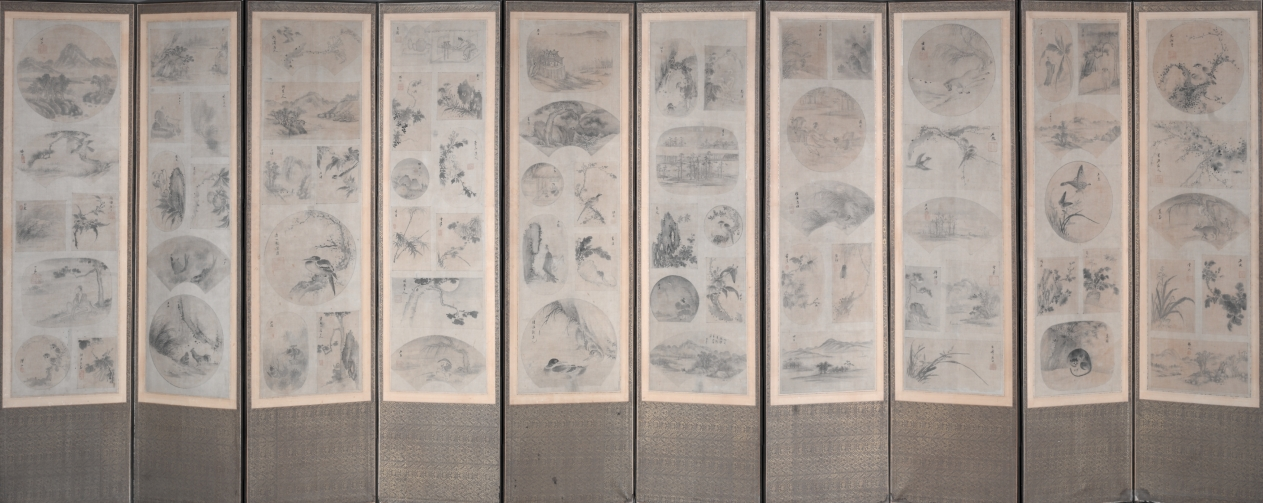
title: Painting of One Hundred Themes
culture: Korea, Joseon dynasty (1392–1910)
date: late 1800s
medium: Ten-panel folding screen affixed with album leaves (obverse), calligraphy (reverse), ink and color on silk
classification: Painting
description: The front of this screen features an assortment of subjects: birds and flowers, landscapes, and scenes of everyday life, mostly in monochromatic ink with light colors. The screen’s reverse side conveys a number of classical poems about the fleeting beauty of the four seasons. Traditionally, only one side of a folding screen bears painted or embroidered images, since these were used as a background furnishing. In Korean houses by the 1800s and early 1900s, however, two-sided folding screens became noticeably popular, possibly inspired by Japanese double-sided folding screens, which mainly served as room dividers in Japanese households.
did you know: The way of displaying small images of various subjects became one of the most popular type of painting toward the end of the 19th century.